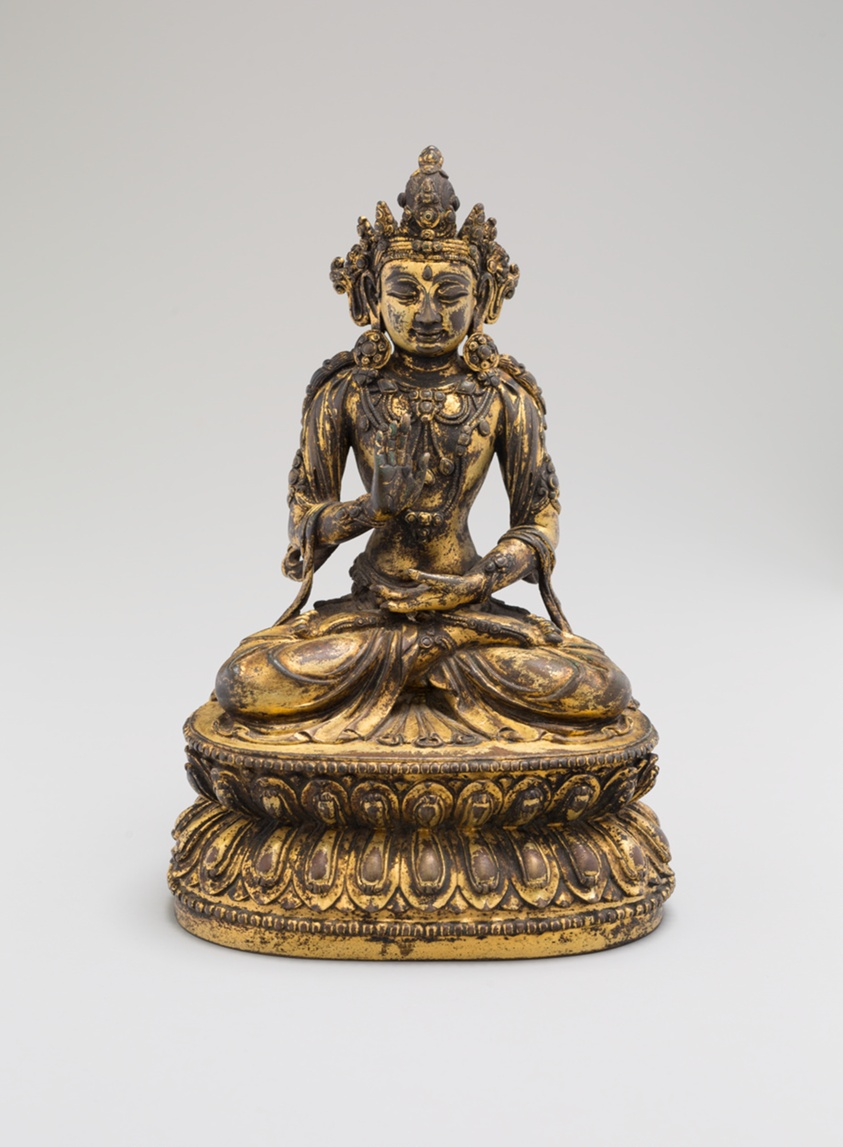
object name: Sculpture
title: One of the Five Celestial Buddhas, Seated with Hands in Gestures of Meditation (Dhyanamudra) and Reassurance (Abhaymudra)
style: Chinese (culture or style)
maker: China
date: Ming dynasty (1368–1644), Yongle period (1403–24)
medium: Gilt copper alloy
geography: China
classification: bronze; metal; sculpture; asian art